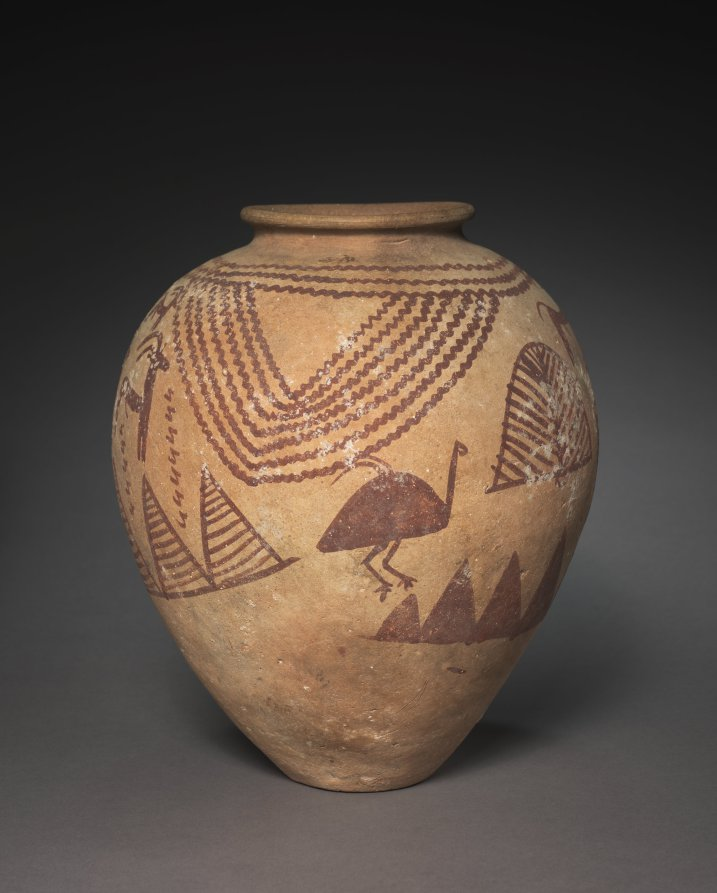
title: Storage Jar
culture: Egypt, Predynastic (5000–2950 BCE), Naqada III (3200–3000 BCE) jar, with modern painted decoration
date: 3100–2950 BCE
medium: marl clay ware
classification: Vessels